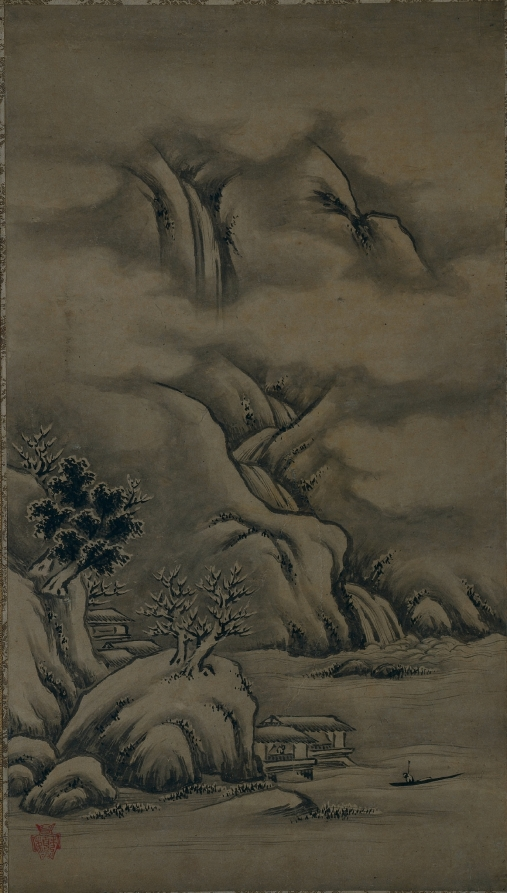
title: Seasonal Landscapes: Winter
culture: Japan, Muromachi period (1392–1573)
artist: Kano Hideyori (Japanese, active mid- to late 1500s)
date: mid- to late 1500s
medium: hanging scroll, ink on paper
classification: Painting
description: Now comprising three scrolls, this composition was originally a set of four paintings depicting the seasons. The set is among the most important of the artist’s surviving works. Each painting was executed in the gyō mode, indicating a speedy brush with rounded strokes. The terms shin (formal), sō (cursive), and gyō (semicursive), borrowed from calligraphy terminology, are terms commonly used by connoisseurs to describe brushwork in ink paintings.